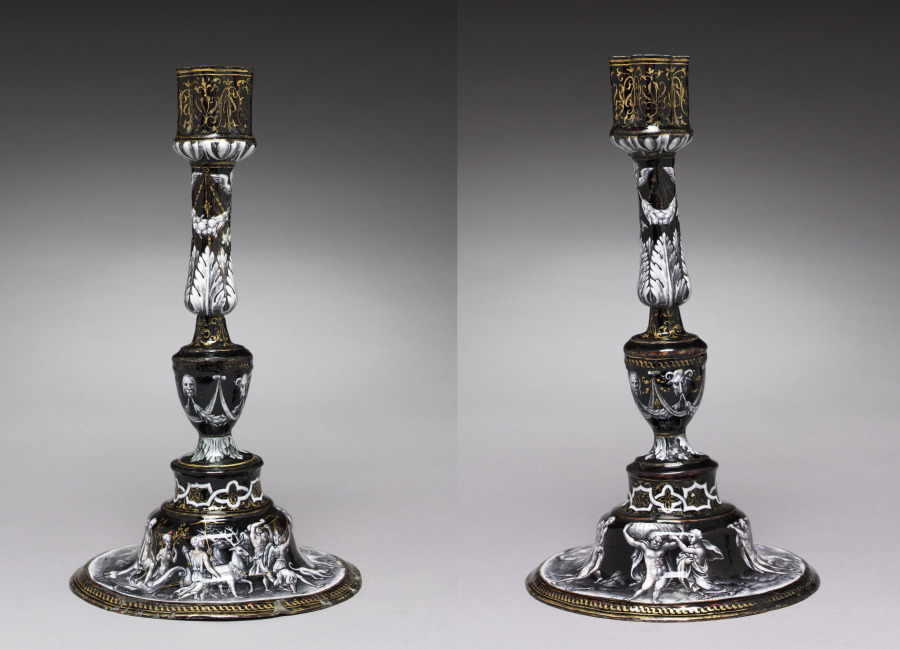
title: Candlesticks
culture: France, Limoges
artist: attributed to Jean II de Court (French, before 1583)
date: c. 1565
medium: painted enamel (grisaille) on copper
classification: Enamel